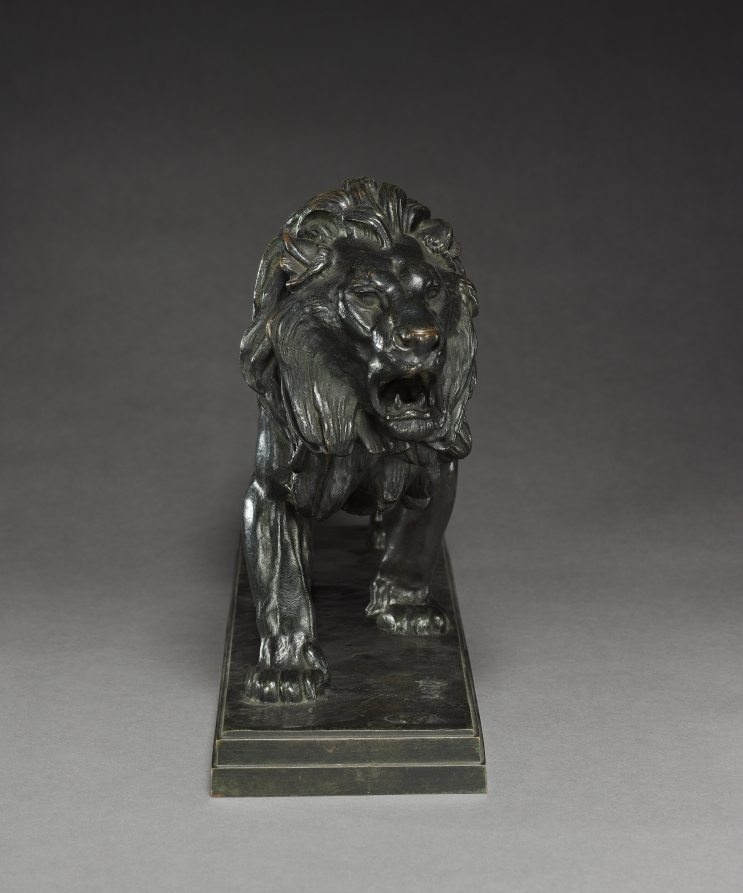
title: Walking Lion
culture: France, 19th century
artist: Antoine-Louis Barye (French, 1796–1875)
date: after 1836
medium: bronze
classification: Sculpture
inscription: Written on base: "Barye"